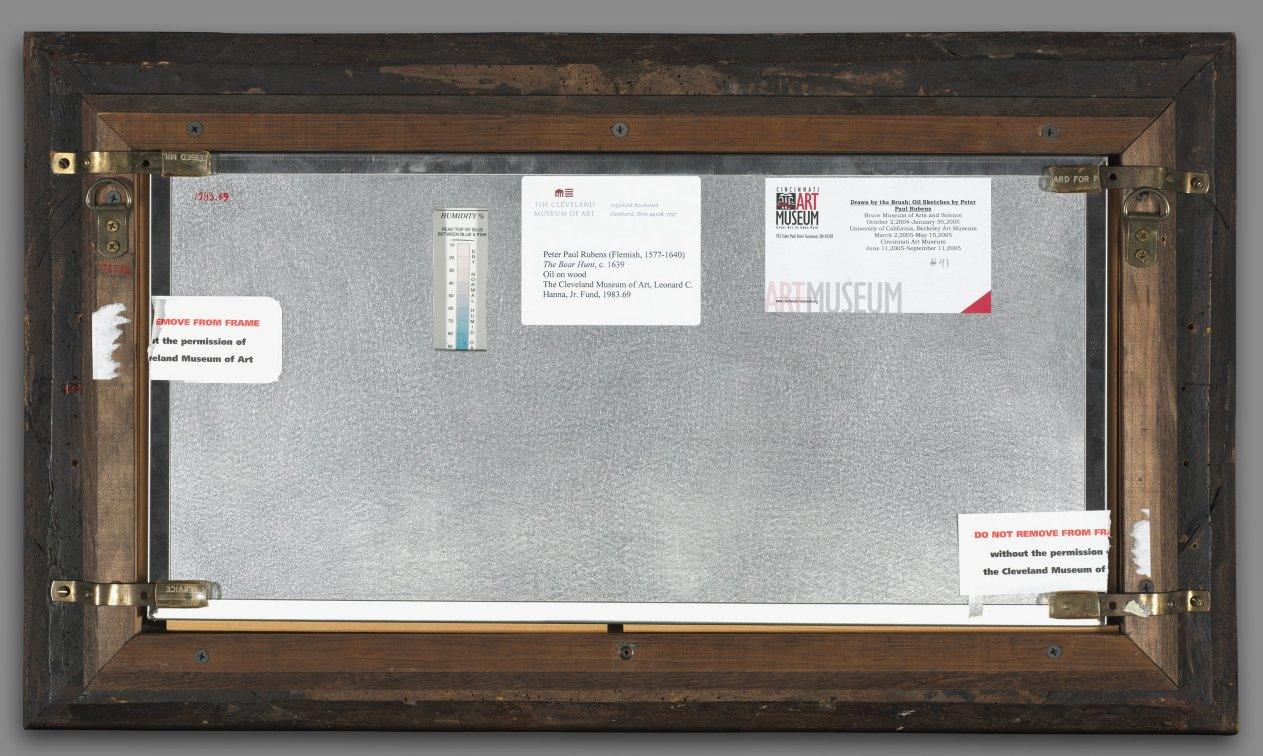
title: Study for "The Bear Hunt" (for the Alcázar, Madrid)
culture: Flanders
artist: Peter Paul Rubens (Flemish, 1577–1640)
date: c. 1639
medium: oil on wood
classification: Painting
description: On June 22, 1639, King Philip IV of Spain received a letter from his younger brother Ferdinand (1609–1641). The letter explained that the artist Peter Paul Rubens had recently completed all of the sketches for a series of paintings that were to hang in the halls of the Alcázar Palace in Madrid. Bear Hunt is one of seven surviving studies out of the original eighteen. In this scene, a bear attacks a hunter and a companion comes to his aide The others work to stave off a second angry bear. The sketch was completed in the last year Rubens's life, and the paintings for the series were never completed.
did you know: With just a few quick brushstrokes, Rubens evokes the energy and drama of a ferocious hunt.